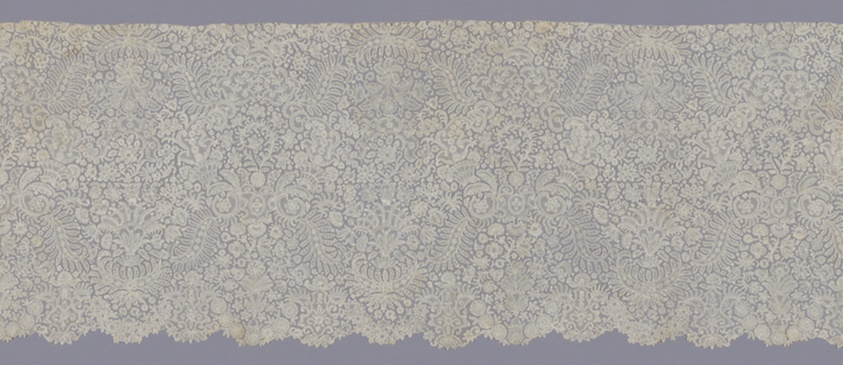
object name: Textile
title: Lace Flounce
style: 18th Century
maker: Brussels, Flanders (present day Belgium)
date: 1720–40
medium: Linen, bobbin part-lace of a type known as "Brussels" with a plaited bar ground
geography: Flanders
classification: textile; lace - bobbin; costume - lace